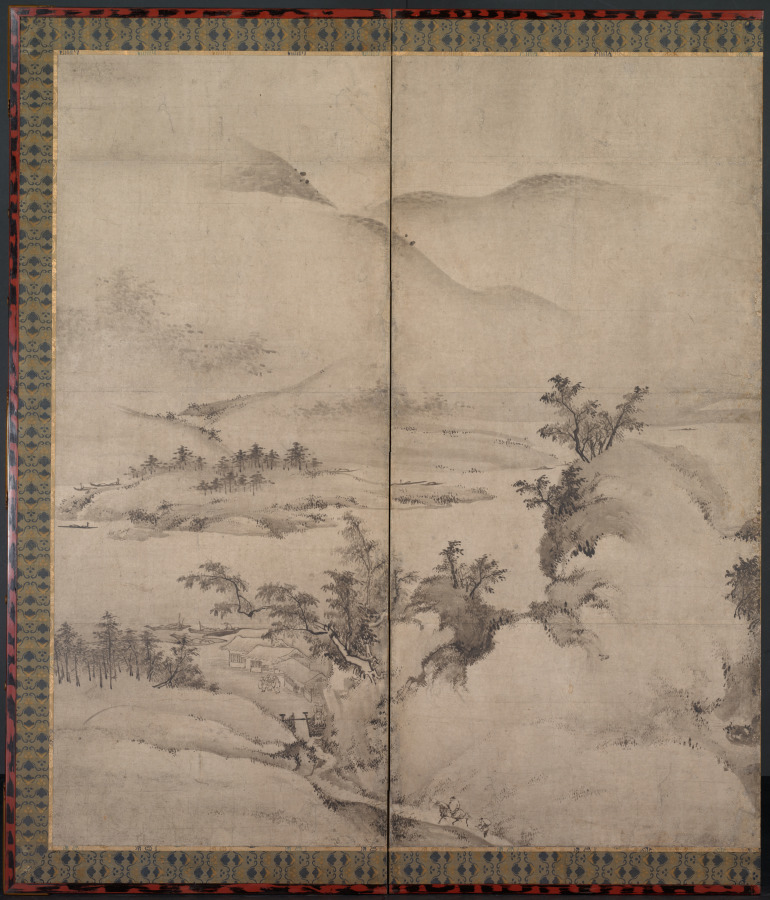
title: Landscape with Motifs from the Eight Views of Xiao-Xiang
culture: Japan, Momoyama period (1573–1615)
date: late 1500s–early 1600s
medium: One of a pair of six-panel folding screens; ink on paper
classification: Painting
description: This screen is from a separated pair depicting the Eight Views of Xiao-Xiang, a Chinese painting and poetry theme. Read in the manner customary for Japan, from right to left, the motifs here are “Evening Bell from a Mist-Shrouded Temple,” “Wild Geese Descending to a Sandbar,” “Sunset Glow over a Fishing Village,” and “Mountain Market in Clearing Mist.” The “crab-claw” style of the trees, in which the branches resemble the curved claws of a crab, and the stippling effect indicate a familiarity with Korean interpretations of Chinese painting styles of the Song dynasty..